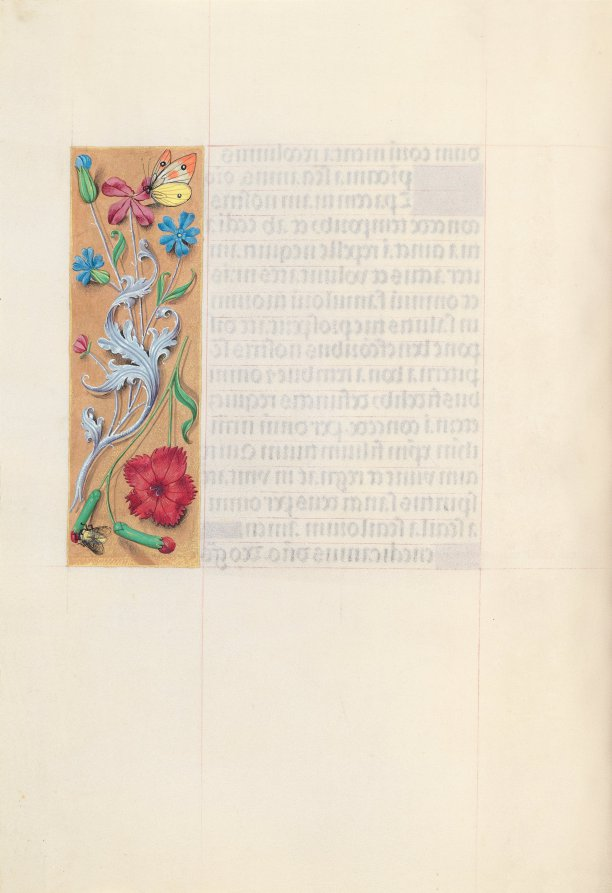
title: Hours of Queen Isabella the Catholic, Queen of Spain: Fol. 140v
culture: Flanders, Ghent and Bruges, late 15th century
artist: Master of the First Prayerbook of Maximillian (Flemish, c. 1444–1519)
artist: and Associates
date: c. 1500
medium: ink, tempera, and gold on vellum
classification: Bound Volume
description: This manuscript was illuminated by a circle of at least five highly organized manuscript painters active in the Flemish cities of Ghent and Bruges. The principal illuminator was Alexander Bening, who painted the majority of the book's miniatures. Manuscripts produced by this circle of artists are renowned for the decoration of their borders, which typically feature a rich variety of realistically-painted flowers, birds, and butterflies. This prayer book, called a book of hours, was intended not for a cleric, but for the private devotions of a lay person-in this case, Isabella the Catholic, Queen of Spain (1451-1504). Isabella's coat of arms embellishes the book's frontispiece. It is unlikely that the book was commissioned by the Queen herself; rather, she probably received it as a diplomatic gift from someone courting her patronage, perhaps Cardinal Francisco Jimenez de Cisneros. A Franciscan friar, Jimenez was dependent upon Isabella for his advancement, first to the post of Queen's confessor in 1492, and then to Archbishop of Toledo in 1495.